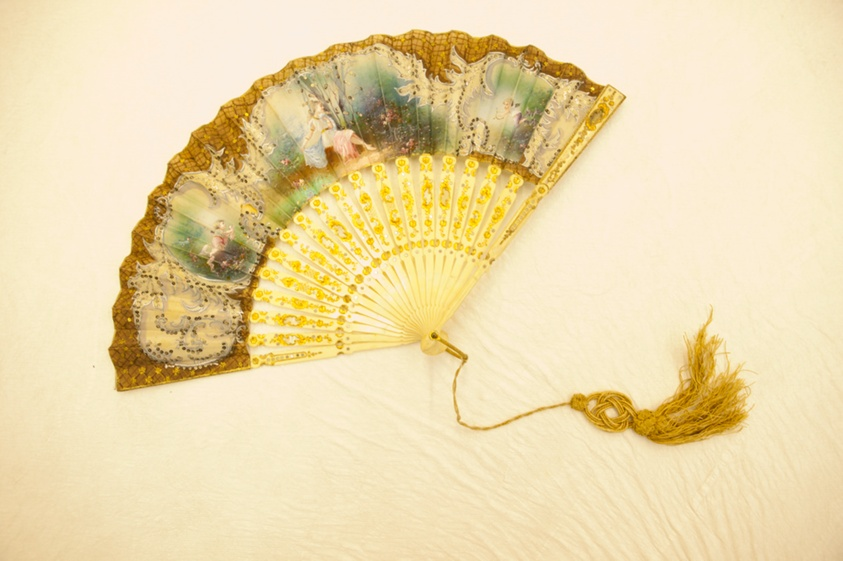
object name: Costume and Accessories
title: Fan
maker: France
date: 1875/1900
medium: Ivory pierced, carved & gilded ivory sticks and guards with mother-of-pearl and marcasite inserts; silk mount, painted, sequins; ecru silk tassel; gilt rivet & loop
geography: France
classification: textile; fan - weaving; costume accessory - folding fan; costume accessory; costume